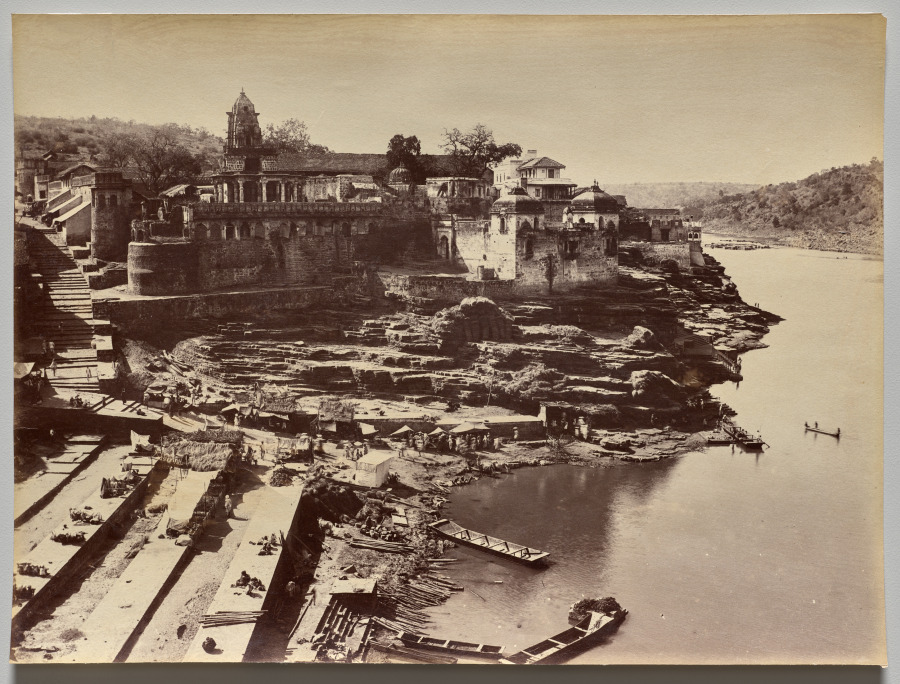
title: View of the Riverbank of the Narmada at Omkareshwar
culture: India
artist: Raja Deen Dayal (Indian, 1844–1905)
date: 1882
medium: albumen print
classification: Photograph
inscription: Graphite inscription on verso: "1624"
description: Bridges now span the river, which is dammed to the east to provide hydroelectric power. When this photograph was made, the river was an important site of trade and transportation, and the riverbank a major locale for commerce and commuting.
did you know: The Omkareshwar shrine, located on an island in the sacred Narmada River, was accessible in the 1800s only by boat.